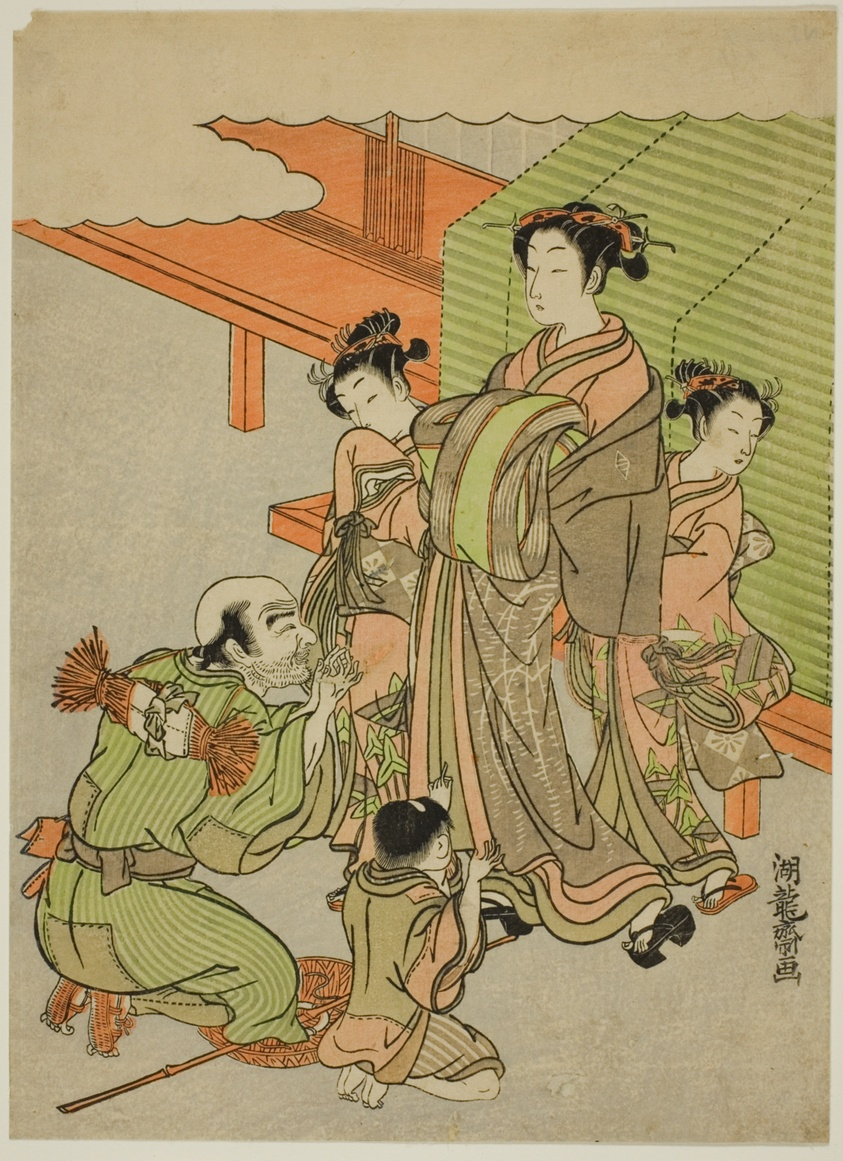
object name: Print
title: Begging for Alms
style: Japanese (culture or style)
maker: Isoda Koryusai (Japanese, 1735-1790)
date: c. 1771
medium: Color woodblock print; chuban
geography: Japan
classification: woodblock print; print; asian art